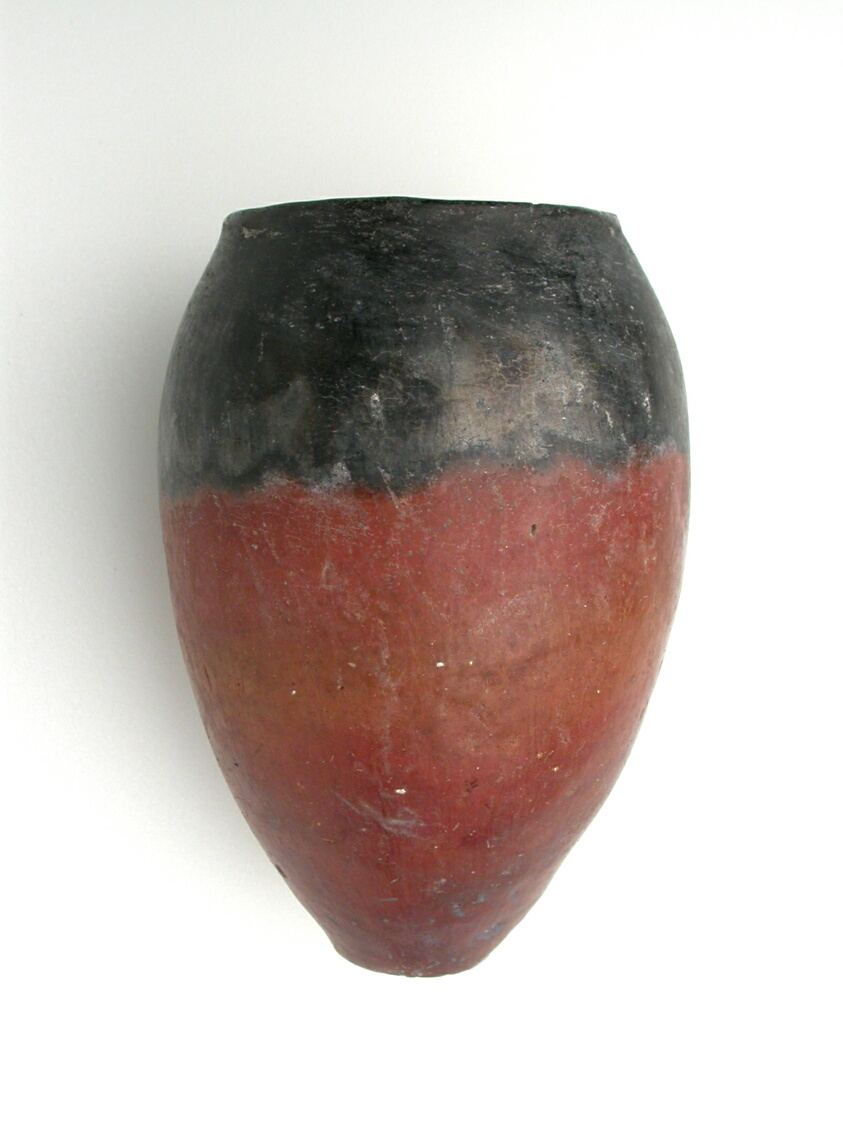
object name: Vessel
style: predynastic, egyptian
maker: Egyptian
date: Predynastic Period, Naqada II (about 3800–3300 BCE)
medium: Ceramic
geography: Egypt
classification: vessel; ceramics; ancient art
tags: vessels